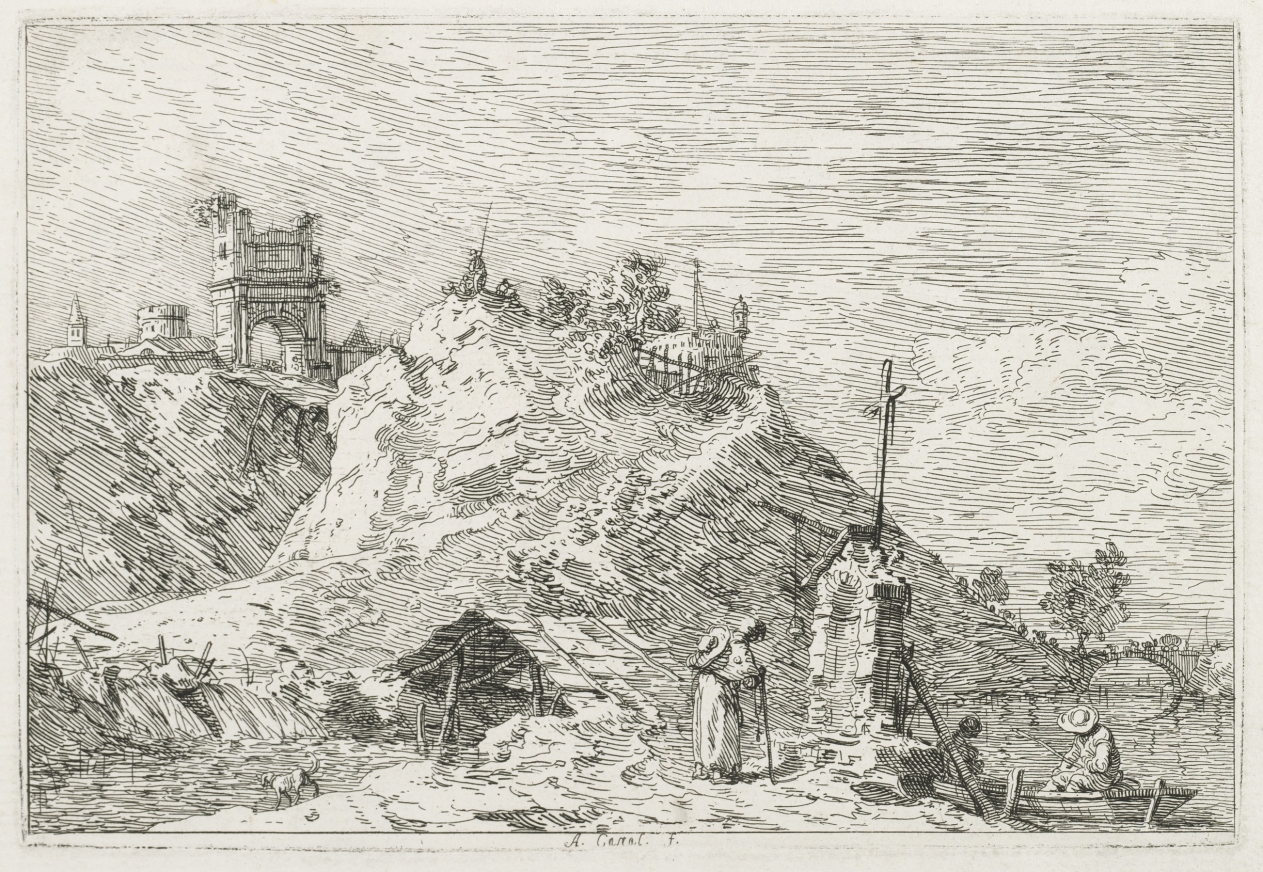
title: Views: A Pilgrim at Prayer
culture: Italy, Venice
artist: Antonio Canaletto (Italian, 1697–1768)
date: 1735–1746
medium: etching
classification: Print